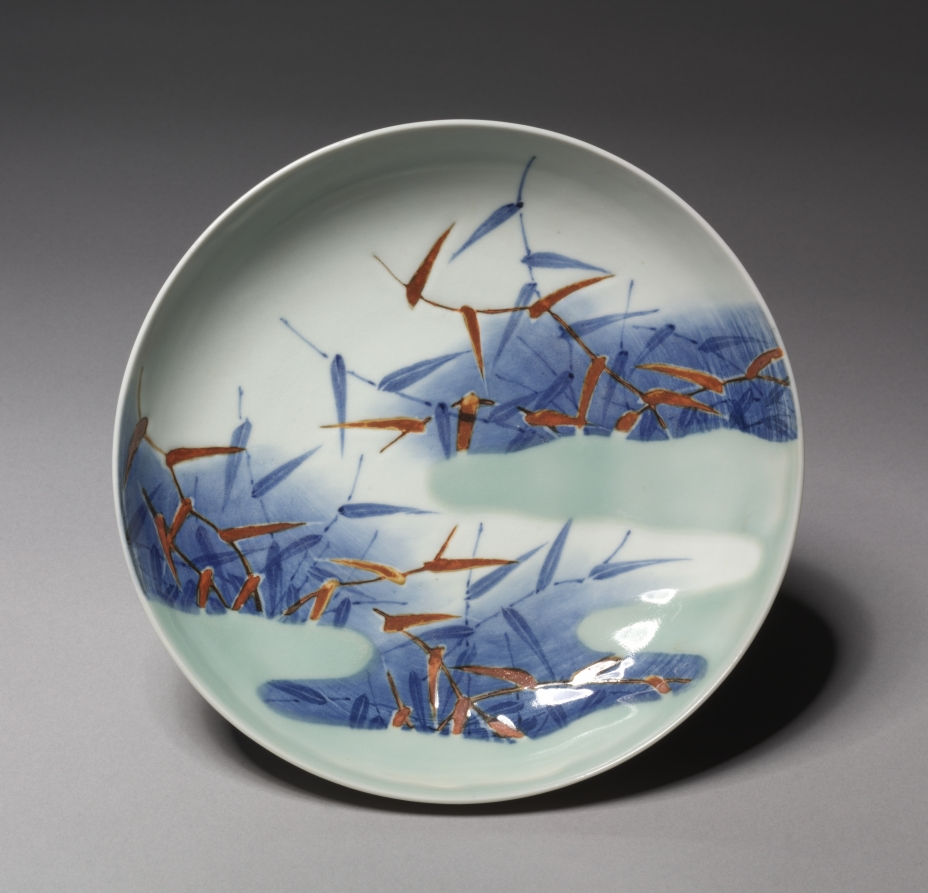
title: Dish with Reeds and Mist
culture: Japan, Edo period (1615–1868)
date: c. 1700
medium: Porcelain with underglaze blue and overglaze color enamel (Hizen ware, Nabeshima type)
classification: Ceramic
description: The interior of this dish features clusters of reeds emerging from mist. The gradation of blue wash in the background suggests that the scene is set by still waters, perhaps the banks of a river or edge of a marsh. The celadon, or pale green glaze, evocative of mist or fog, contrasts visually with the reeds and water.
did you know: Nabeshima dishes were produced in standard sizes of three, five, and seven sun (a traditional measurement of around 3 cm) in diameter.